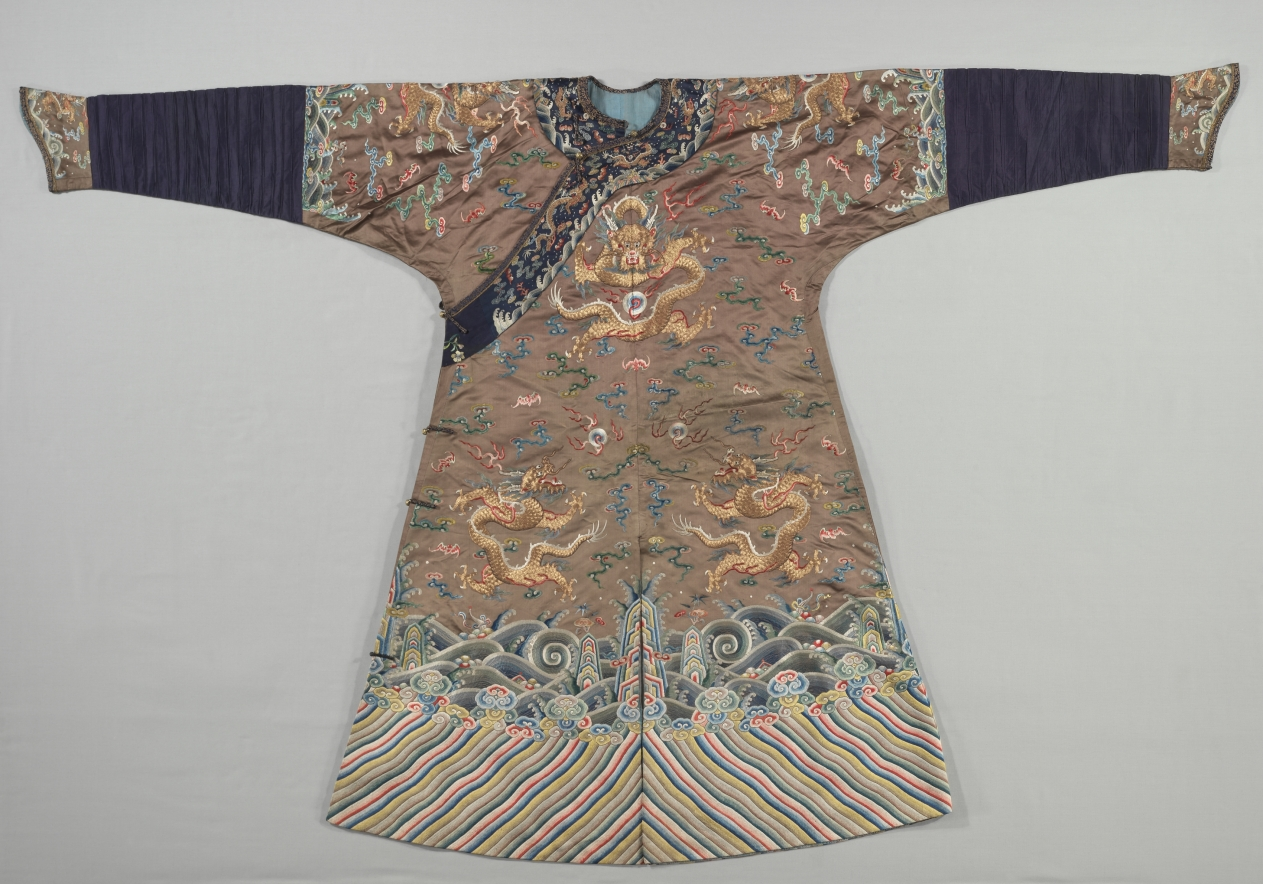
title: Mandarin Coat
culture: China, Qing dynasty (1644–1911)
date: late 1700s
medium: embroidery, silk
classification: Garment